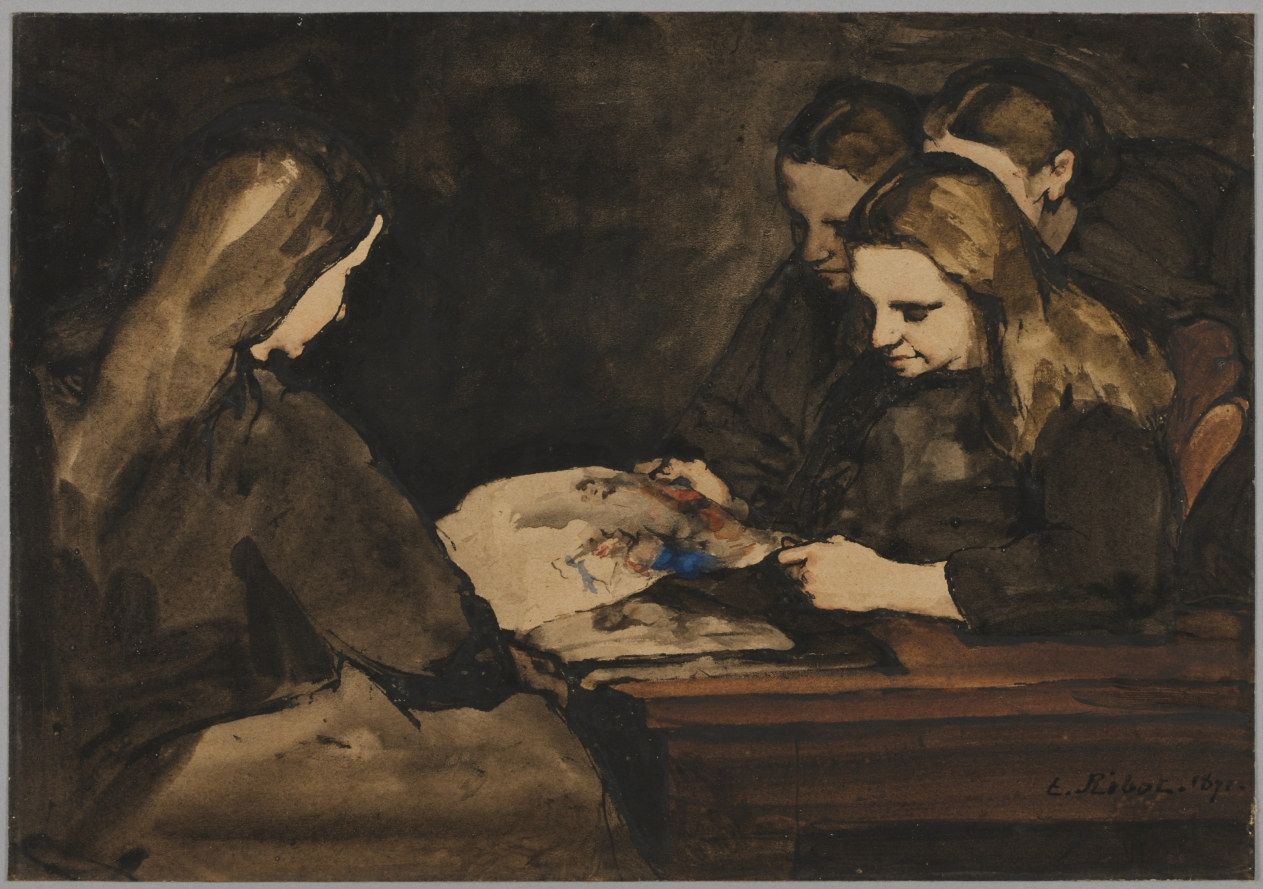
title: Four Girls Studying a Drawing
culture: France, 19th century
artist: Théodule Ribot (French, 1823–1891)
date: 1876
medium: watercolor and possibly ink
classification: Drawing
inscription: Signed bottom right in watercolor: t. Ribot. 1876. Inscribed on verso in graphite, S.W. biseau or 8 (%?) creuse rapporté bleuté tous à revers